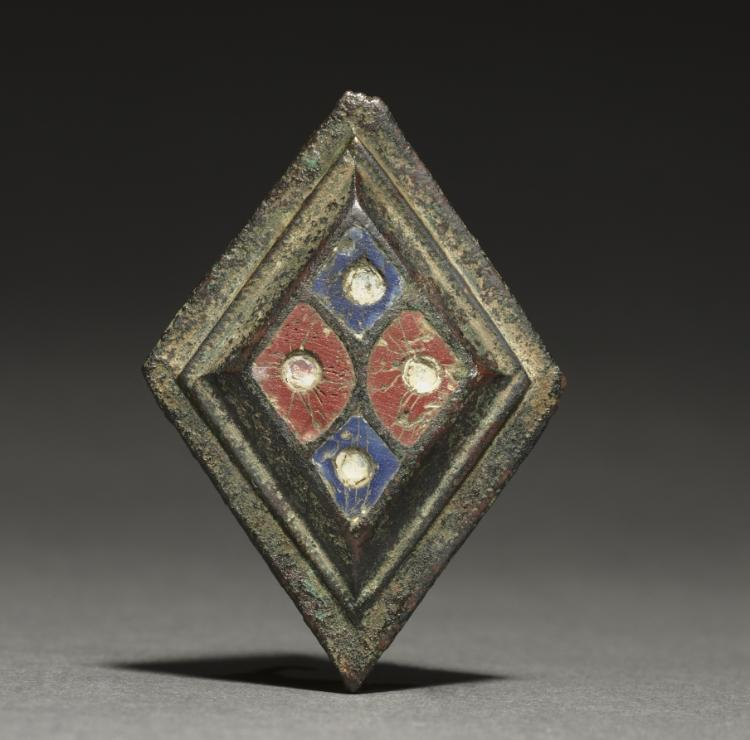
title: Ornamental Brooch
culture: Gallo-Roman or Romano-British, Migration period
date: c. 100–300 CE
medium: bronze and champlevé enamel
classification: Jewelry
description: These brooches functioned as garment clasps (much like the generally larger fibulae) and are distinctive for their decorative enamels. The art of enameling was highly popular among the conquered peoples who lived on the outskirts of the Roman empire, chiefly the Celts and the Gauls. Though the enameling technique was practiced by the Romans themselves on small objects, the brightly colored decoration readily appealed to "barbarian" taste. By the AD 200s, enameled brooches like these were being made in abundance by the native peoples of Britain and Gaul (modern France and Belgium).